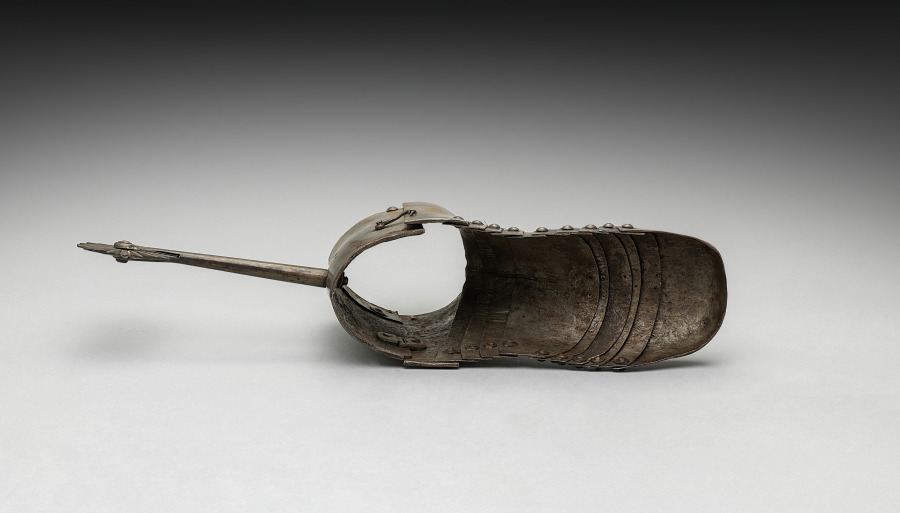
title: Left Sabatoun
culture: Germany, 19th century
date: 1801–1900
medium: steel with black paint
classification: Arms and Armor